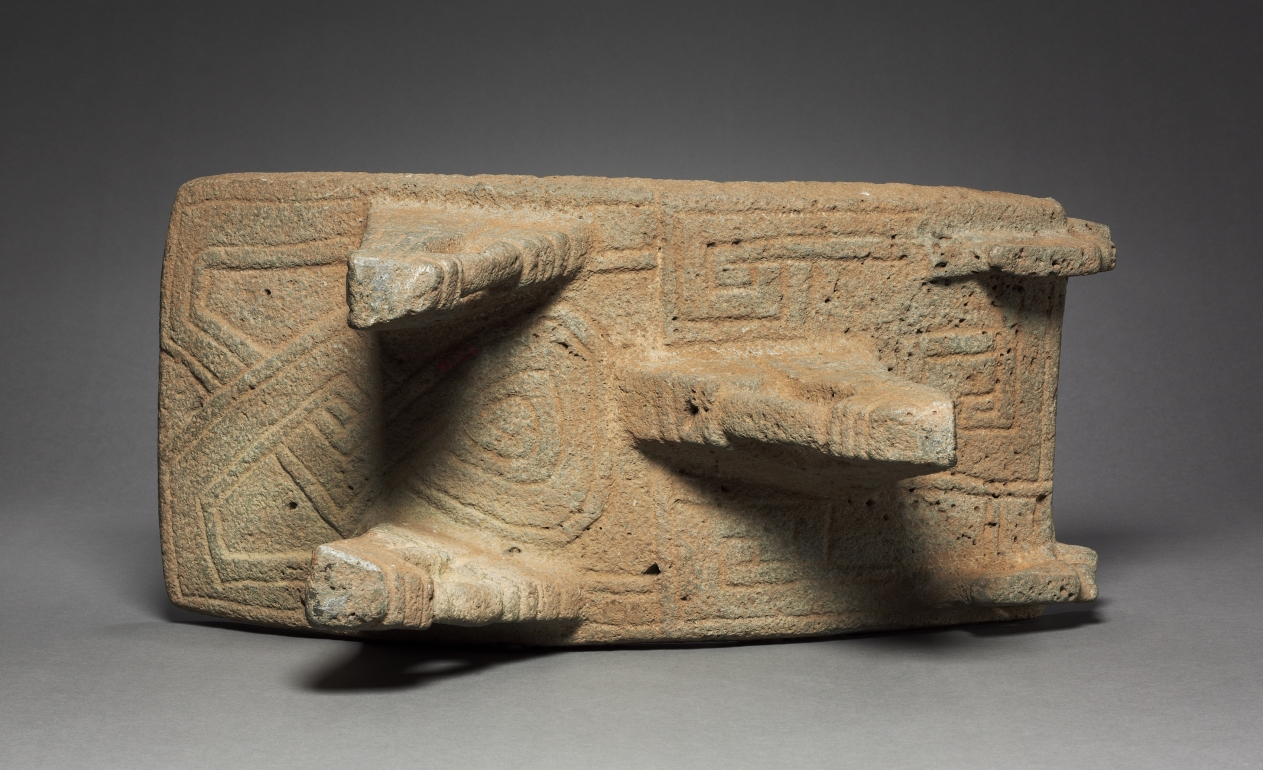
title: Metate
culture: Costa Rica, Guanacaste, northwest coast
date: 1200–1500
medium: gray volcanic stone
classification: Sculpture